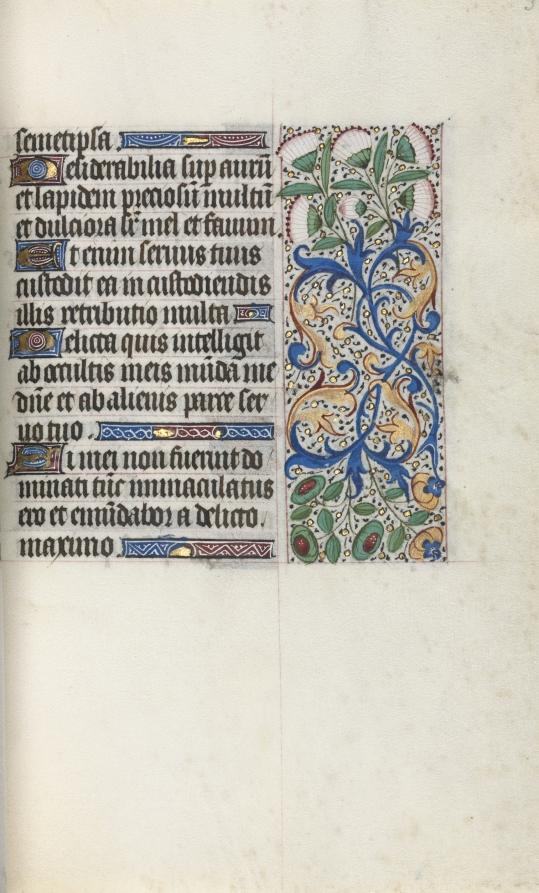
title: Book of Hours (Use of Rouen): fol. 33r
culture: France, Rouen, 15th century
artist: Master of the Geneva Latini (French, active Rouen, 1460–80)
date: c. 1470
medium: ink, tempera, and gold on vellum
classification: Bound Volume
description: In the late 1400s and early 1500s Rouen was an established and important center of book production. The city’s cathedral had a wealthy chapter that spent large sums of money to commission books and to maintain its extensive library. The stationers and booksellers would have likely been concentrated in or near the cathedral precinct. This artist, named after a manuscript now in Geneva, was Rouen’s principal illuminator during the second half of the 1400s.